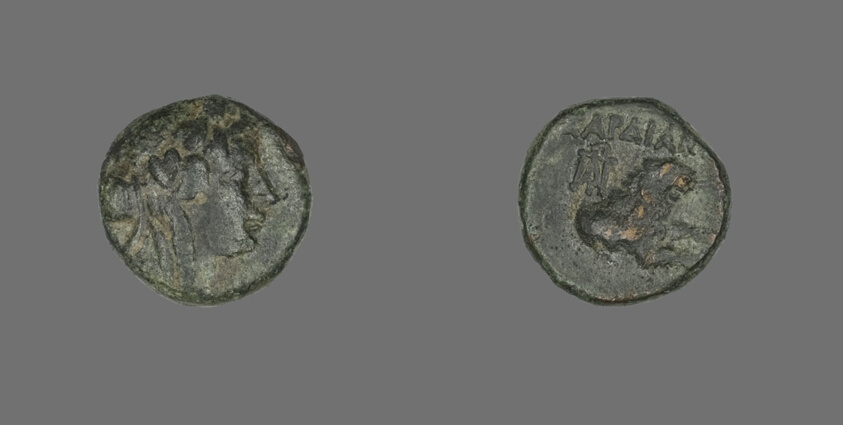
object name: Coin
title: Coin Depicting the God Dionysos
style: greek, ancient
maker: Greek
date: about 133 BCE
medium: Bronze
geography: Ancient Greece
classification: coin; ancient art